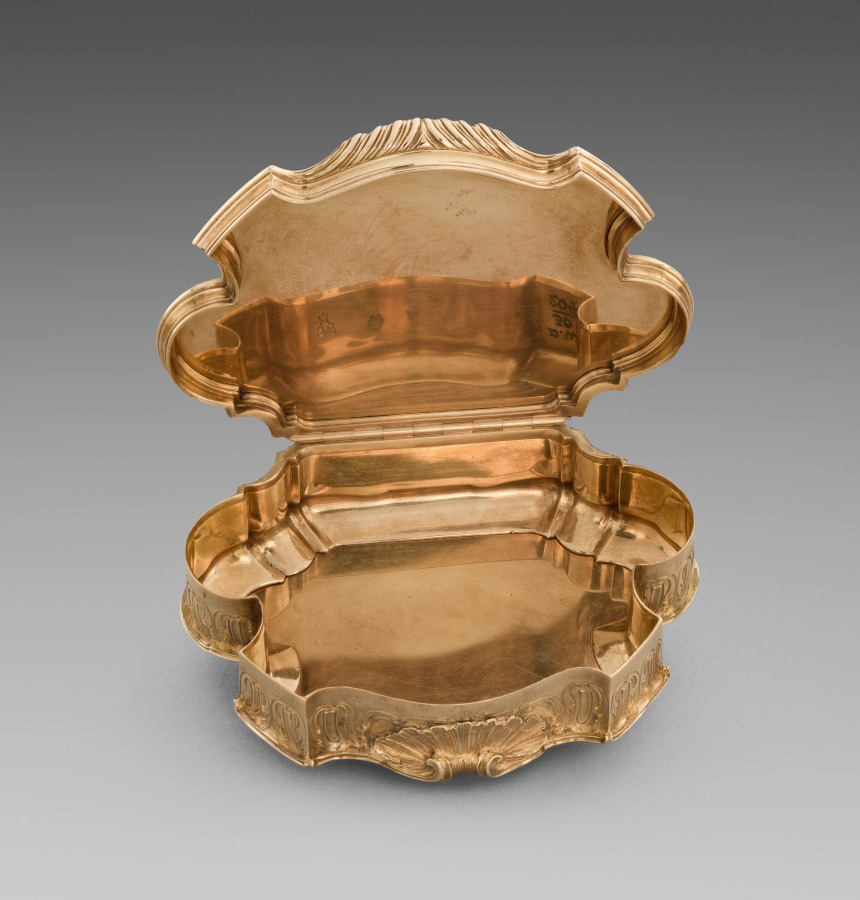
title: Gold Box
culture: France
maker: Juste-Aurèle Meissonnier (French, 1695–1750)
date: 1728–29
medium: gold and lapis lazuli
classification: Metalwork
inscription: IOM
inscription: a crowned M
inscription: a crowned dolphin's head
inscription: a crowned chancellor's mace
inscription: double frame eagle's head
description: With its central cartouche, heavy molding, and fluted sides, the design of this box attests to Juste-Aurèle Meissonnier’s interest in architecture. The box is further distinguished by a strong sense of movement, achieved through its dynamic contour, extraordinary level of detail, and the dramatic contrast between gold and lapis lazuli. Such small boxes, known as snuffboxes, were used to hold scented powdered tobacco that was inhaled through the nostrils. Made of precious materials and highly ornamented, they conveyed the owner’s wealth, fashion awareness, sophistication, and social standing. These personal, collectible items were often presented as luxurious gifts. This box was made for the dowager Queen of Spain, Maria Anna of Neuburg, whose coat of arms – along with that of her late husband, Charles II – features on the cover.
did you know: This is one of the two known objects that bear the maker's mark of Meissonnier.